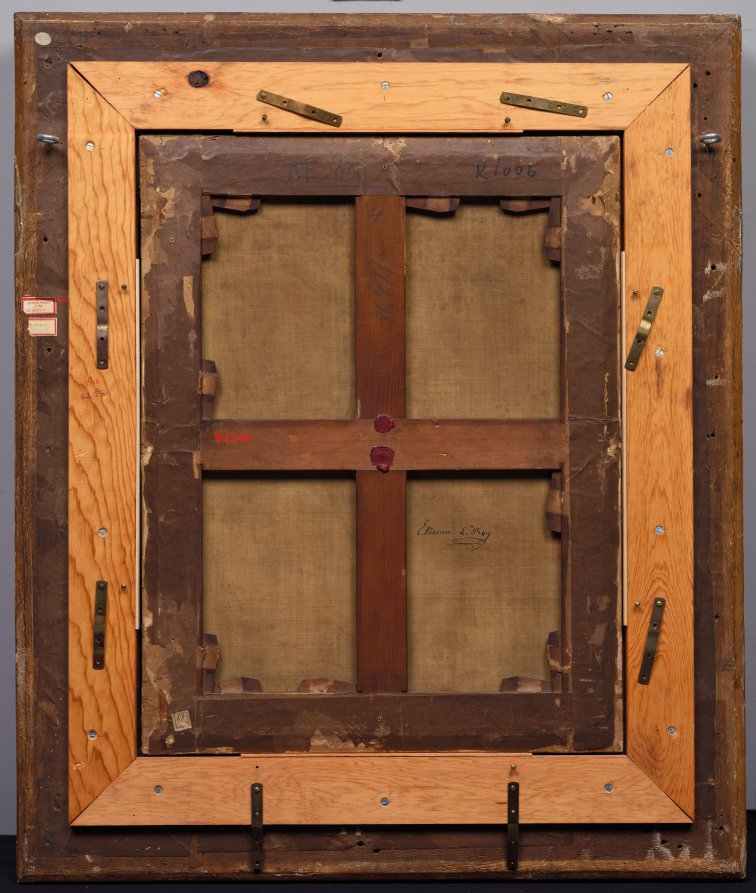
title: Landscape with a Church by a Torrent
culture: Netherlands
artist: Jacob van Ruisdael (Dutch, 1628/29–1682)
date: c. 1670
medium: oil on canvas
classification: Painting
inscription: Signed lower right: JvRuisdael [JvR in monogram]"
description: It is not known if Ruisdael considered his paintings to be social or moral commentary, for no documents from his lifetime indicate how the artist or his patrons interpreted the works. But in this painting dangerous rapids block access to the chapel, and severed logs litter the middleground, hinting at life’s transience and the challenge to reach salvation.